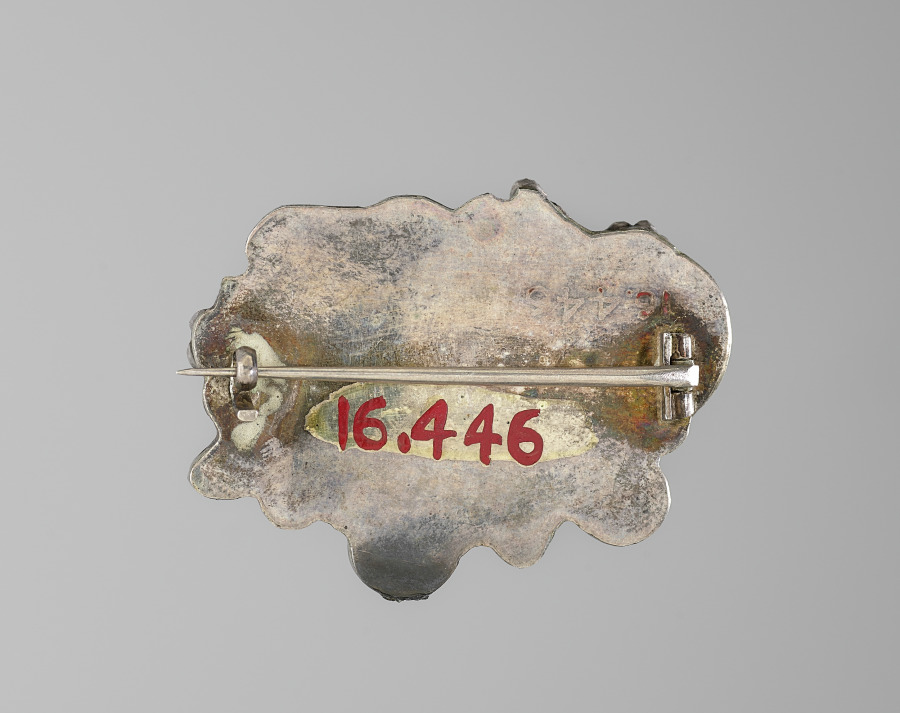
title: Brooch with Garuda and Naga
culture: India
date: 1800s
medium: silver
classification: Jewelry